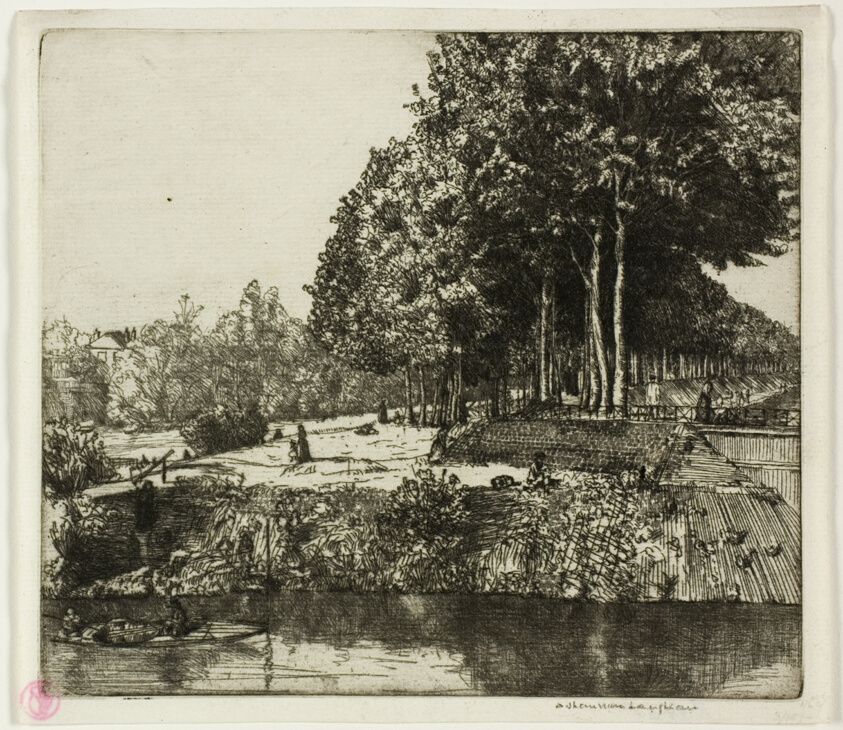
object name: Print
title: Canal at Charenton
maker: Donald Shaw MacLaughlan (American, born Canada, 1876-1938)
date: 1901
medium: Etching in black on ivory laid paper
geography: United States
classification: etching; print; prints and drawing